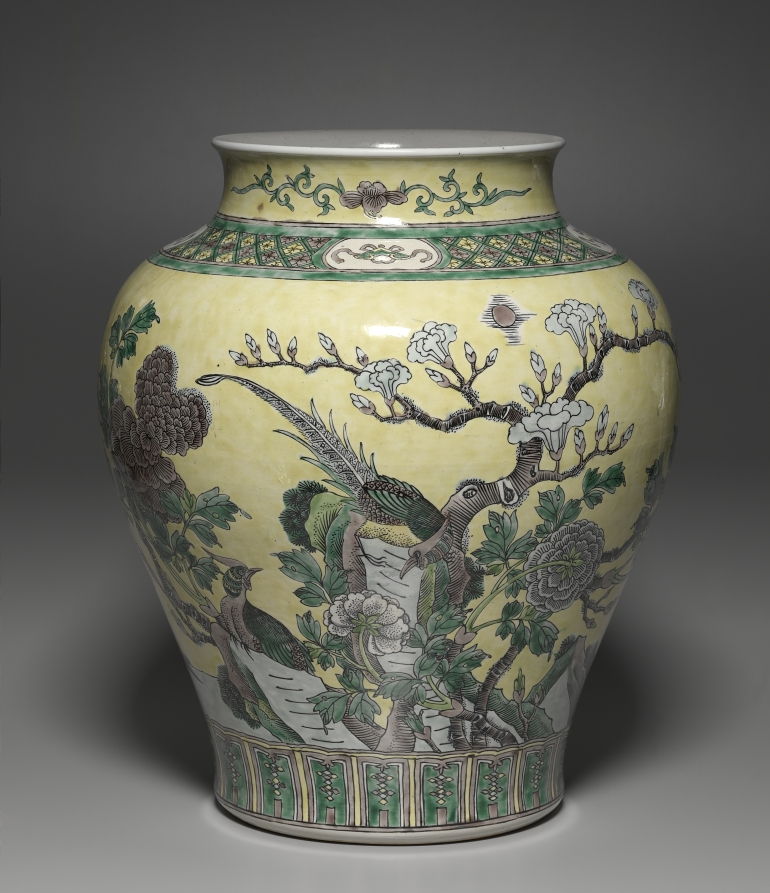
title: Jar with Flowers, Rocks and Pheasants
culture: China, Qing dynasty (1644-1911), Kangxi mark and reign (1662-1722)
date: 1662–1722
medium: enameled porcelain, with susancai (plain three-color) decoration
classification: Ceramic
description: In the Qing dynasty, art reached a high standard of technical perfection despite a tendency for extravagance and exaggerated ornament. This jar with susancai (plain three-color) decoration uses shades of light green, purple, and yellow, but no red. The vase features a pair of pheasants looking at each other among flowering plants, such as peonies and magnolia. The porcelain painter used fine dark outlines in a more graphic style to delineate motifs, to texture rocks, and depict minute details such as holes in weathered leaves of plants.